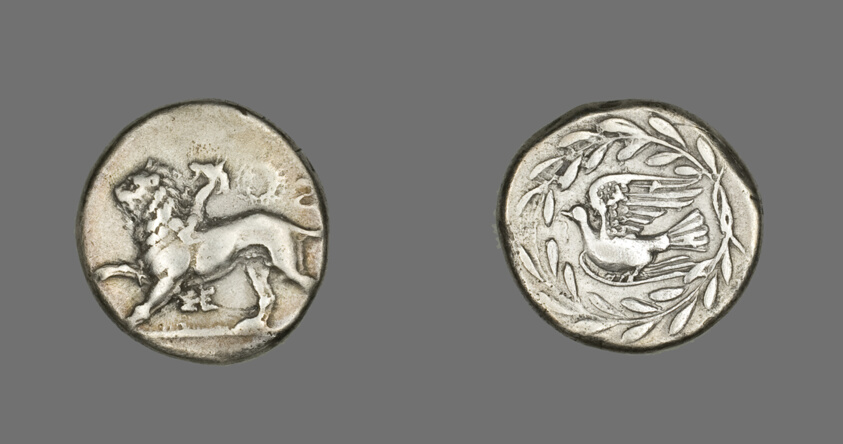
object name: Coin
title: Aeginetic Stater (Coin) Depicting a Chimera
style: greek, ancient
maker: Greek; minted in Sikyon, Peloponnesus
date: 431-400 BCE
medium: Silver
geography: Sikión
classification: coin; ancient art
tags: mythological figures, doves, animals